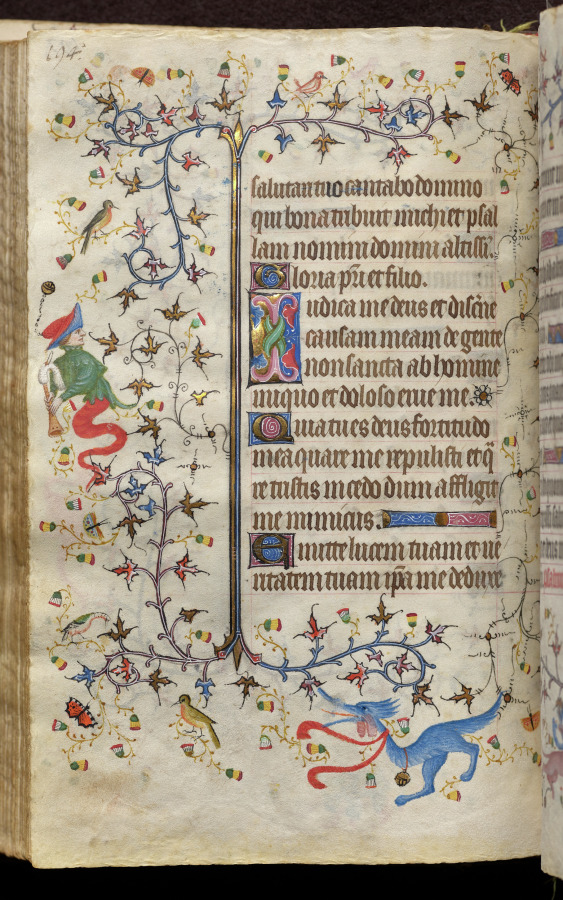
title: Hours of Charles the Noble, King of Navarre (1361-1425): fol. 97v, Text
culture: France, Paris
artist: Master of the Brussels Initials and Associates (French)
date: c. 1405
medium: ink, tempera, and gold on vellum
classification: Bound Volume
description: This precious volume was obviously highly prized by its owner, the French-born King of Navarre, who had his coat of arms painted on no less than twenty folios. Rather than directly commissioning this manuscript from a specific workshop, it seems that Charles the Noble acquired his book of hours -- perhaps ready-made for the luxury market -- while on a trip to Paris in 1404-05. A collaborative effort, six painting styles are evidenced within the pages of this codex, those of two Italians, two Frenchmen, and two Netherlanders. The painter who was responsible for the planning and decoration of the book, and who produced seventeen of the large miniatures, was a Bolognese artist known as the Master of the Brussels Initials. His principal assistant, responsible for most of the borders, was a Florentine who signed his name "Zecho" da Firenze on folio 208 verso.